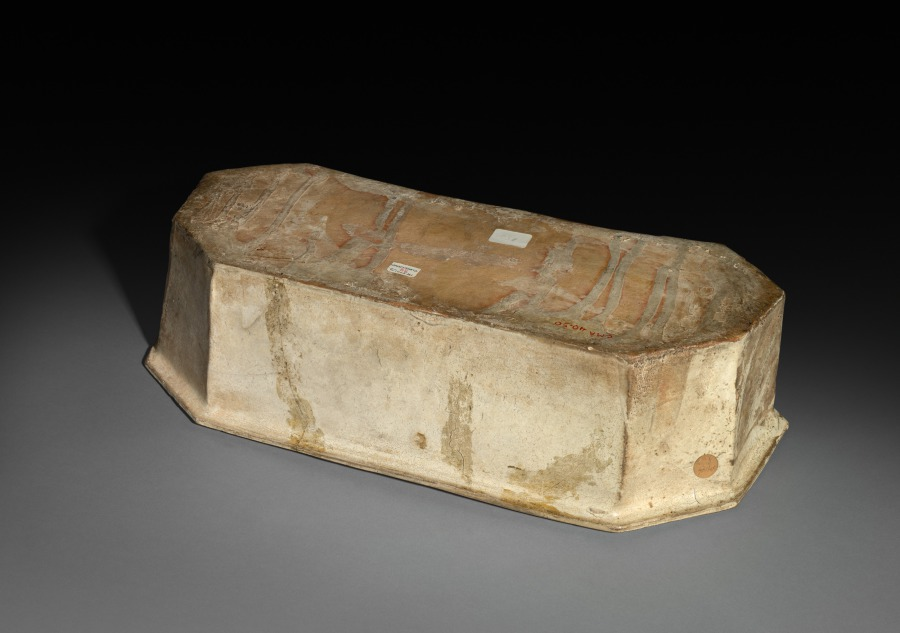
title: Pillow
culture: China, Northern Song dynasty (960-1127)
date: 1000s–1100s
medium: Buff stoneware with carved underglaze slip decoration, Cizhou ware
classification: Ceramic